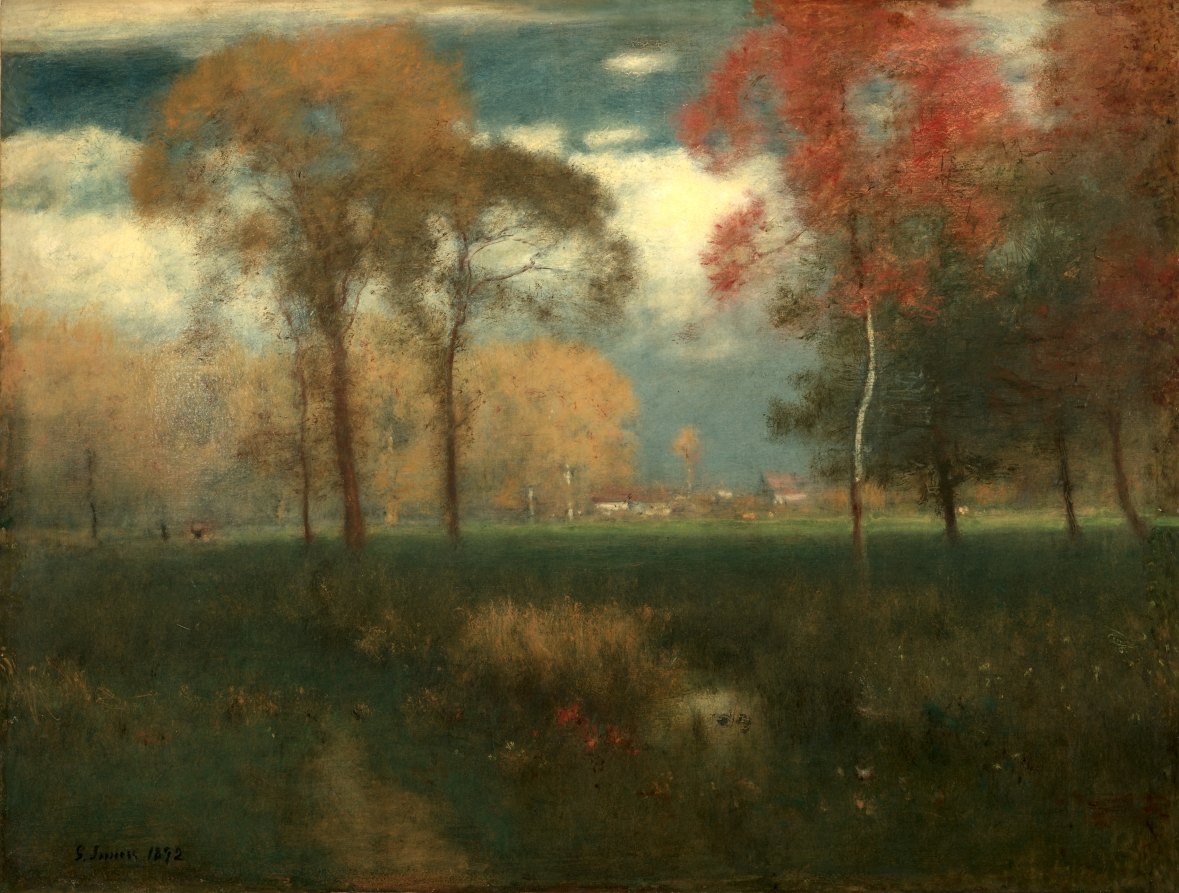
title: Sunny Autumn Day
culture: America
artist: George Inness (American, 1825–1894)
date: 1892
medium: oil on canvas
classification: Painting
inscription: Signed lower left: "G. Inness 1892:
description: Highly prolific, Inness created more than 1,000 works during a career lasting 50 years. Dated just two years before his death, Sunny Autumn Day epitomizes his late style in which the physical landscape is transformed into something akin to a spiritual apparition. Featuring blurred forms and atmospheric effects from translucent colors, this scene reflects Inness’s mystical view of the natural world.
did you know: Inness died while viewing a sunset, proclaiming, "Oh, how beautiful!” and falling to the ground.